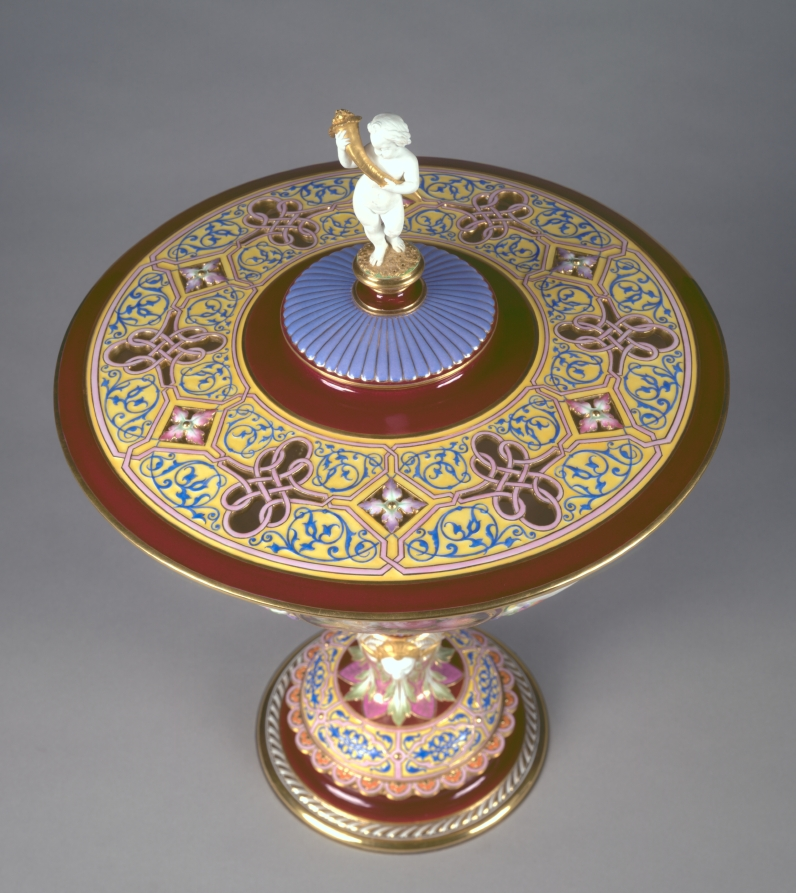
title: Standing Cup and Cover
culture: France, Sèvres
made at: Sèvres Porcelain Factory (French, est. 1756)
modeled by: Hyacinthe-Jean Regnier (French, 1803–1870)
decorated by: Francois-Hubert Barbin (French, 1786-)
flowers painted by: Jacques-Nicolas Sinsson (French)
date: 1844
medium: porcelain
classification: Ceramic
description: The official French porcelain factory at Sèvres has always been one of Europe's most important ceramic manufacturers, famous for its decorative pieces as well as more utilitarian wares. This vase in the Renaissance style, its design inspired by 16th-century French examples, is clearly in the tradition of elaborately conceived and decorated pieces intended for use by the French court or as presentation pieces by its monarchs. The latter was the fate of this Covered Cup, acquired in 1846 by Queen Marie-Amélie d'Orleans, the wife of Louis-Philippe, king during the July Monarchy (1830-48). Soon thereafter the vase was presented to a now unknown person. It is one of four pieces of this design made at the Sèvres factory, and the only one known today to have survived.